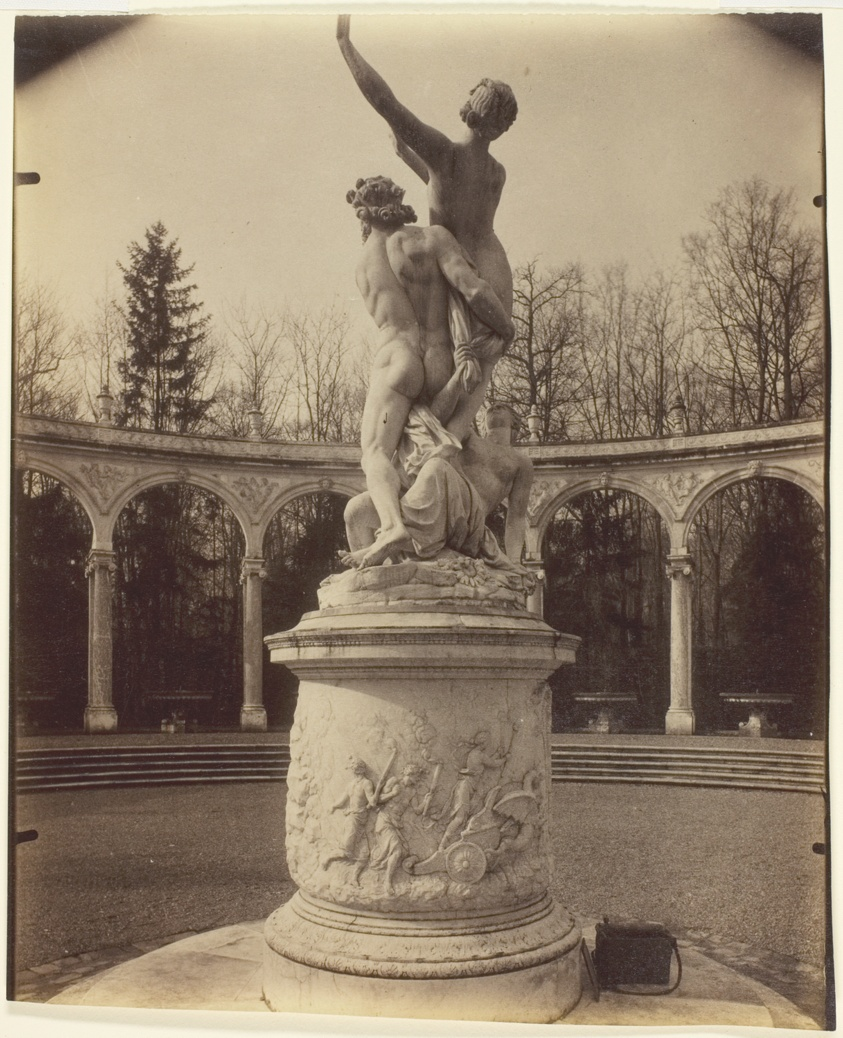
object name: Photograph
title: Versailles, Enlèvement de Proserpine par Pluton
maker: Jean-Eugène-Auguste Atget (French, 1857–1927)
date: 1904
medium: Albumen print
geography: France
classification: albumen silver print; photographic process; photography; photograph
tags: Collected by Hugh Edwards